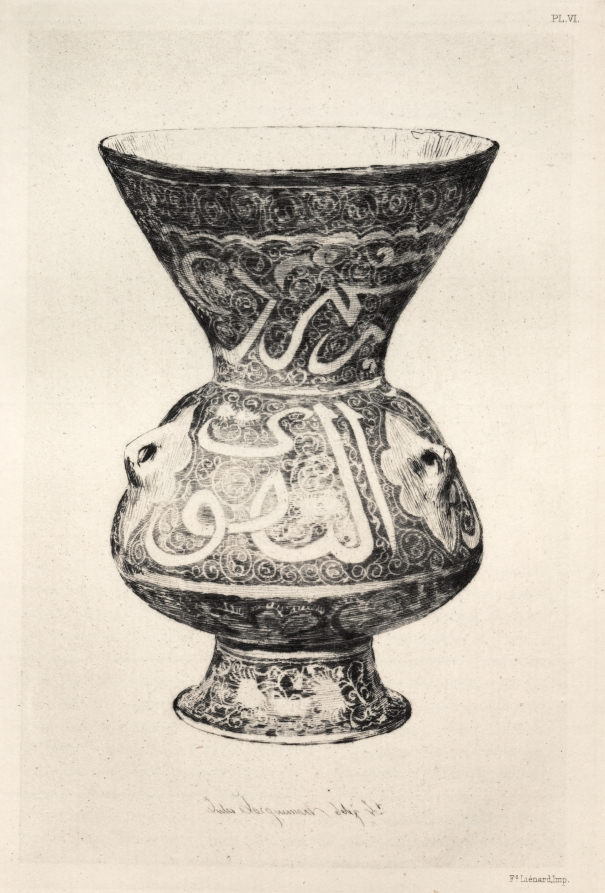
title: History of the Ceramic Art: A Descriptive and Philosophical Study of the Pottery of All Ages and All Nations: Italy: Renaissance- Majolica of Urbino- Hunting Bottle with Historic Subjects (Plate VII)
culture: France, 19th century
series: Book by Albert Jacquemart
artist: Jules Jacquemart (French, 1837–1880)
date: 1877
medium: etching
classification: Bound Volume